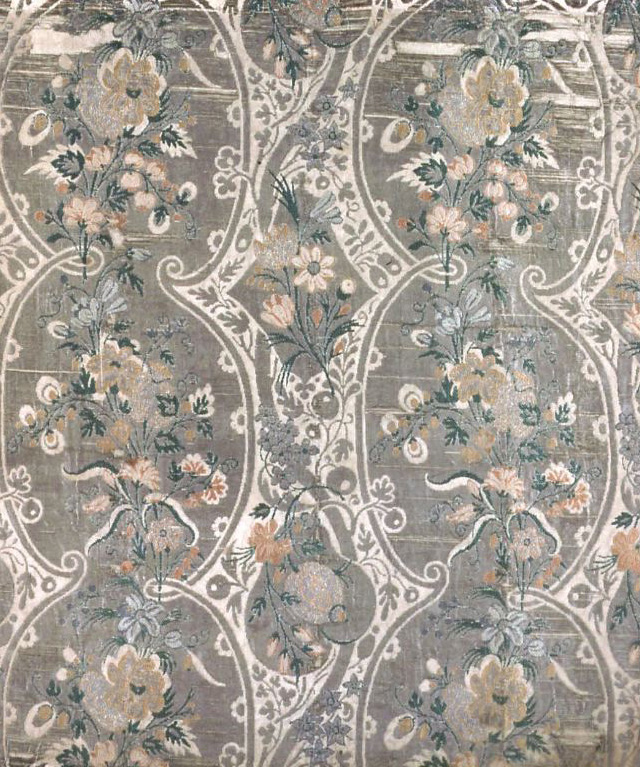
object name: Textile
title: Panel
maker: France or England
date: c. 1709/11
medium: Silk, gilt-metal-strip-wrapped silk, plain weave with supplementary patterning and supplementary brocading wefts tied by supplementary binding warps in weft-float-faced 3:1 and 2:2 twill interlacings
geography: France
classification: textile; weaving